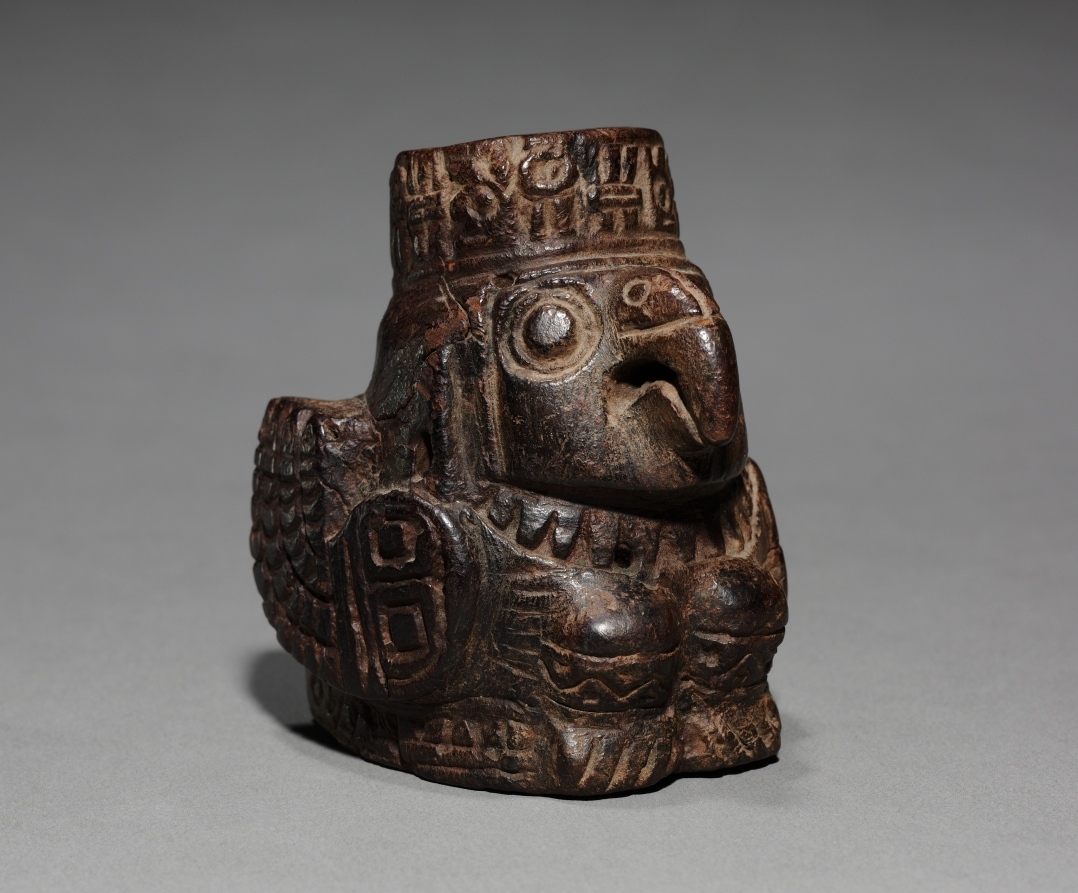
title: Bird-Shaped Container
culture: Peru, Wari style (500-900)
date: 500–900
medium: wood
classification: Sculpture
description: Peruvian Indians today regard coca leaf as a sacred substance that creates communion with deities. The leaves are chewed with powdered lime that in antiquity was stored in containers and scooped with spatulas like those seen here. Aside from its ritual meaning, coca has practical benefits: it is vitamin-rich and, like coffee, induces clear-headedness. The lizard spatula is Nasca; the other two are Wari.